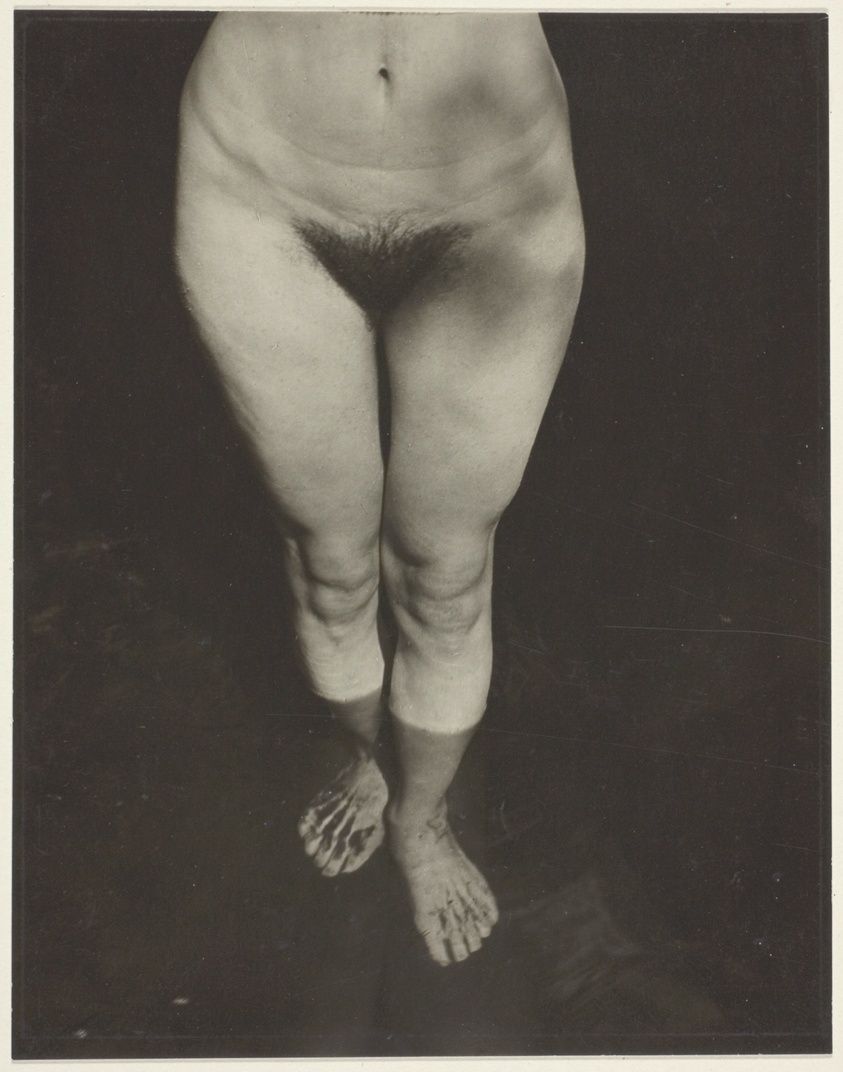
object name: Photograph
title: Rebecca Salsbury Strand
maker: Alfred Stieglitz (American, 1864–1946)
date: 1922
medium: Gelatin silver print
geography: United States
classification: gelatin silver (developing-out-paper) pr; photographic process; photography; photograph